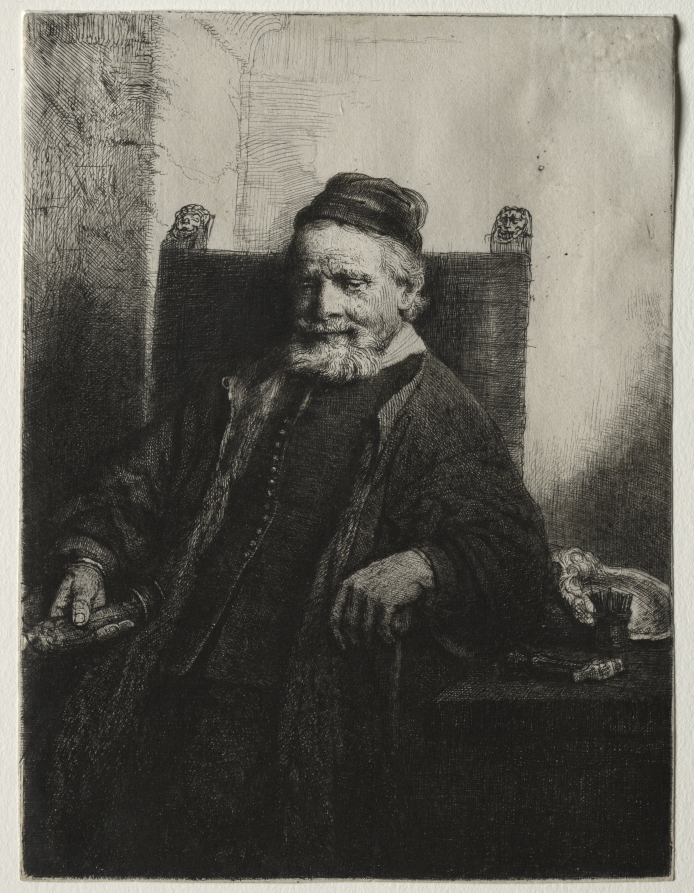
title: Jan Lutma, Goldsmith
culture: Netherlands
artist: Rembrandt van Rijn (Dutch, 1606–1669)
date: 1656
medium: etching and drypoint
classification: Print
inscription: VERSO, upper left, in pen and brown ink: [Mr Usle ? (underlined)] ; lower left, in graphite: f2120 ; lower left, in pen and brown ink: H[circled] ; lwoer left, in graphite: B. 276- Bl. 182 ; lower left, in graphite: A 265 ; lower right, in graphite: Henry Francis Jr[underlined] ; lower right, in graphite: C53X6